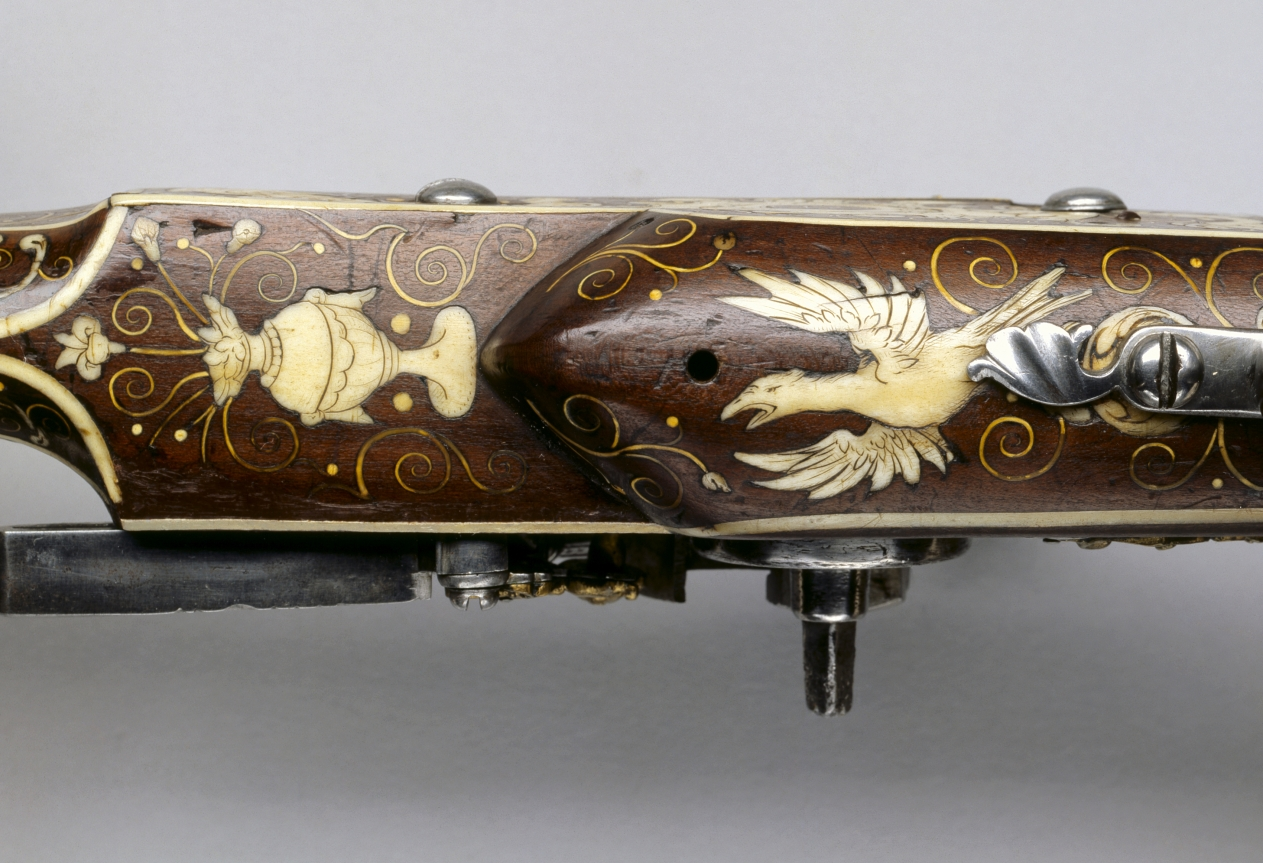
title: Wheel-Lock Rifle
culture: Germany, Bavaria (?), 17th century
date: 1618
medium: steel, brass, walnut stock inlaid with bone, horn and ivory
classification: Arms and Armor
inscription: on barrel: 1618, S.H.; on stock: FF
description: Made originally as a petronel pistol, this firearm seems to have been refitted with a new stock sometime during the 17th century to convert it into a rifle, most likely for a child's use.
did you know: The artisan who made this rifle used brass, bone, horn, and ivory to create decorative elements like animals involved in the hunt, fruits, and other details. If you look beneath the gun, you will see a goose or duck and a vase of flowers near the trigger.